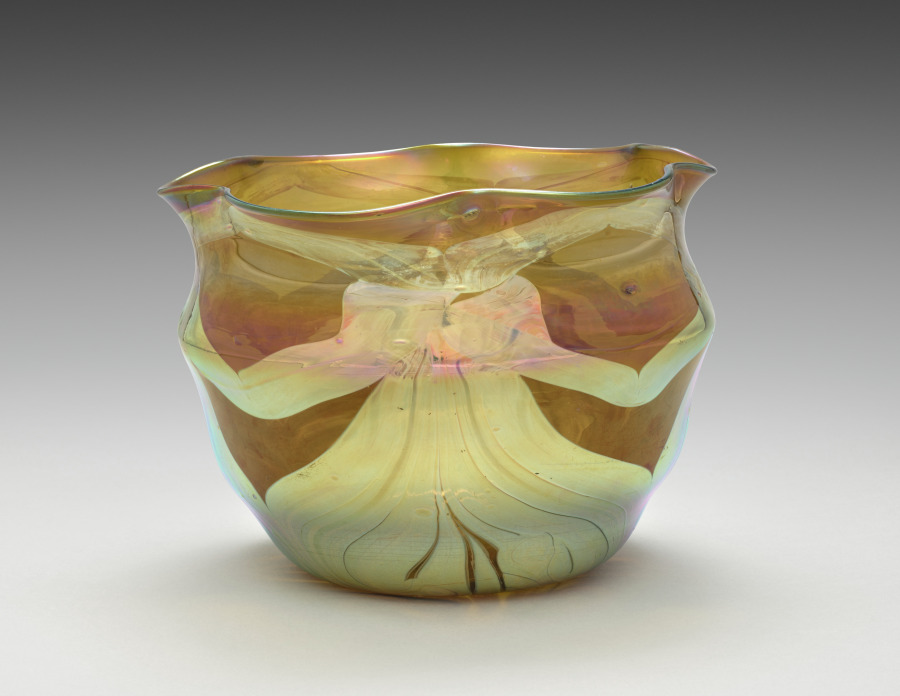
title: Bowl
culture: America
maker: Tiffany Glass & Decorating Company (America, New York, 1892–1902)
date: c. 1896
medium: Favrile glass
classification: Glass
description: Among his many achievements in the decorative arts, Louis Comfort Tiffany invented a type of glass with unprecedented opalescence that he patented under the name Favrile, derived from an Old English word meaning "handcrafted." Tiffany memorably described his Favrile glass as "distinguished by brilliant or deeply toned colors, usually iridescent like the wings of certain American butterflies, the necks of pigeons and peacocks, the wing covers of various beetles."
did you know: Located in Lake View Cemetery in Cleveland, Wade Memorial Chapel features an interior designed by Tiffany.